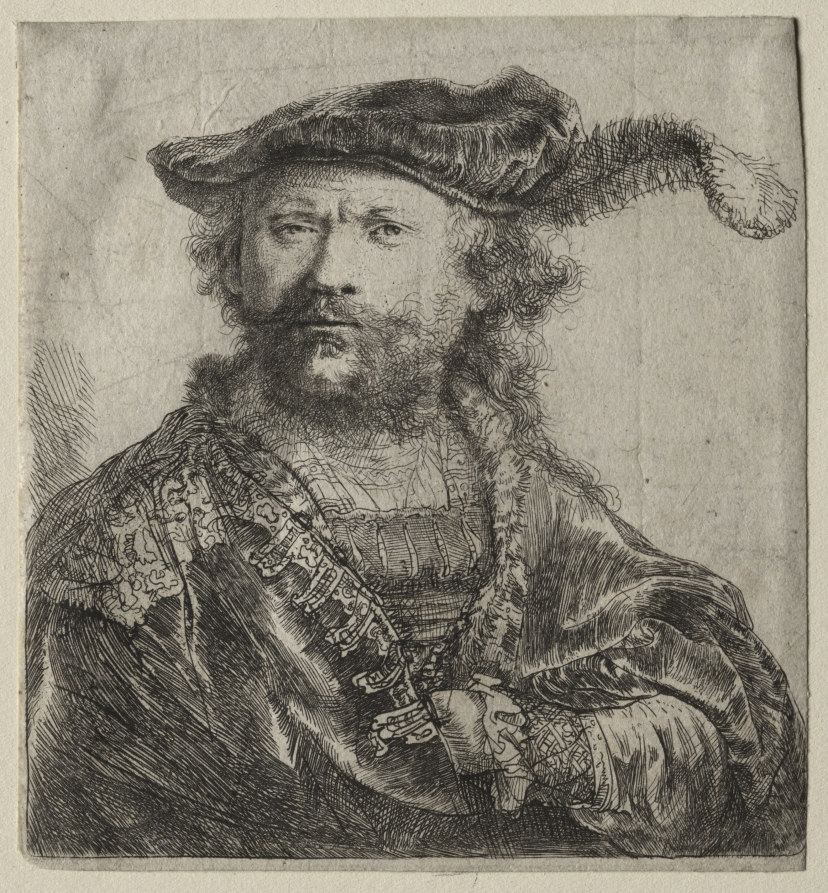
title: Self-Portrait in Velvet Cap with Plume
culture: Netherlands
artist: Rembrandt van Rijn (Dutch, 1606–1669)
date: 1638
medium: etching with engraving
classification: Print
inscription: VERSO, upper left, in graphite: G. 6123 ; left center, in graphite: v[?] ; center, in graphite: B.20 ; center, in graphite: 18 ; lower left, in graphite: W. 20 ; lower center, in graphite: ober verk[illegible]ten ; lower right, in graphite: Re/2TT